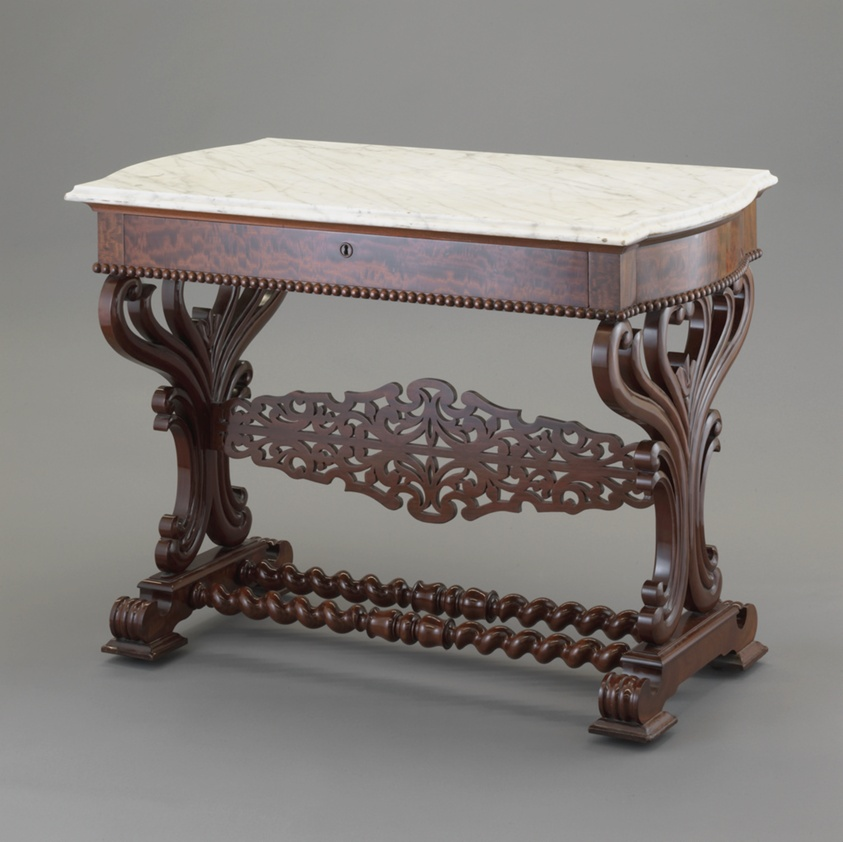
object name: Furniture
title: Table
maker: John and Joseph W. Meeks Company (American, active 1836–59); New York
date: 1836–46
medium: Mahogany, mahogany veneer, and marble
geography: New York City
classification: table; furniture; american decorative arts; american arts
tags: furniture